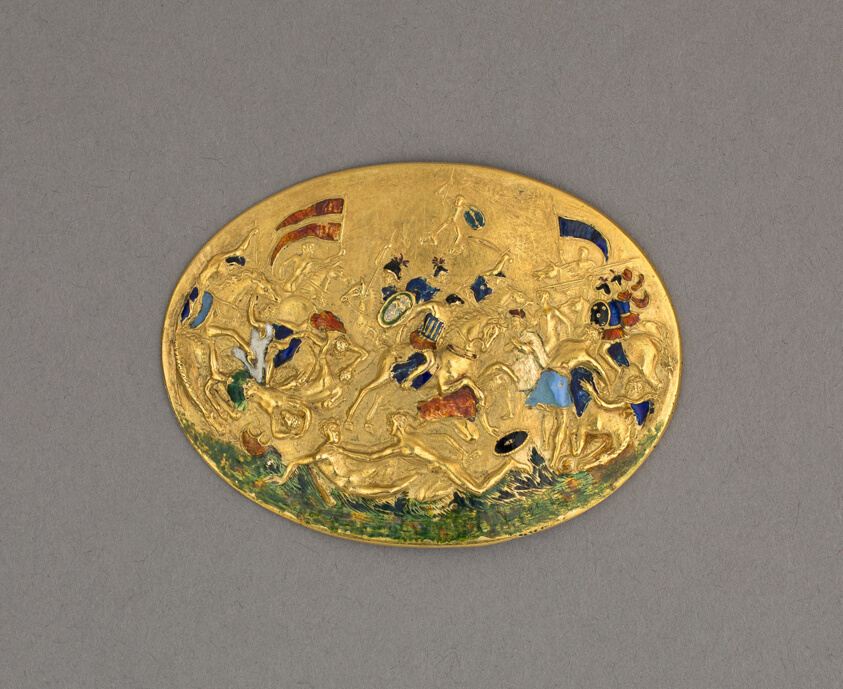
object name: Metalwork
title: Plaque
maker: French (?)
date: 19th century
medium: Enameled gold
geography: France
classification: jewelry; european decorative arts; metalwork